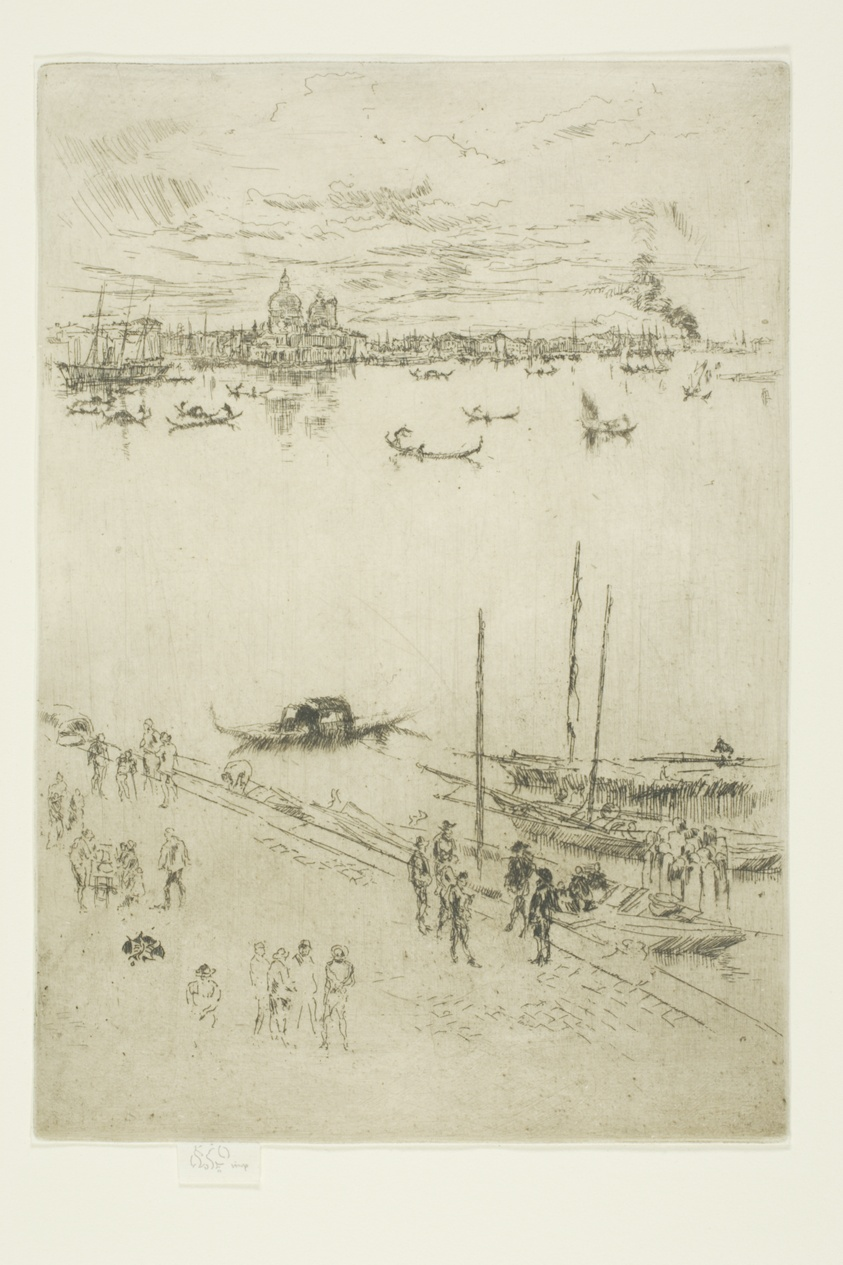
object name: Print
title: Upright Venice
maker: James McNeill Whistler (American, 1834-1903); published by Dowdeswell and Dowdeswell (English)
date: 1879/80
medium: Etching and drypoint with foul biting in black ink on off-white laid paper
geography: United States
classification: etching; foul biting; print; prints and drawing; drypoint; paper